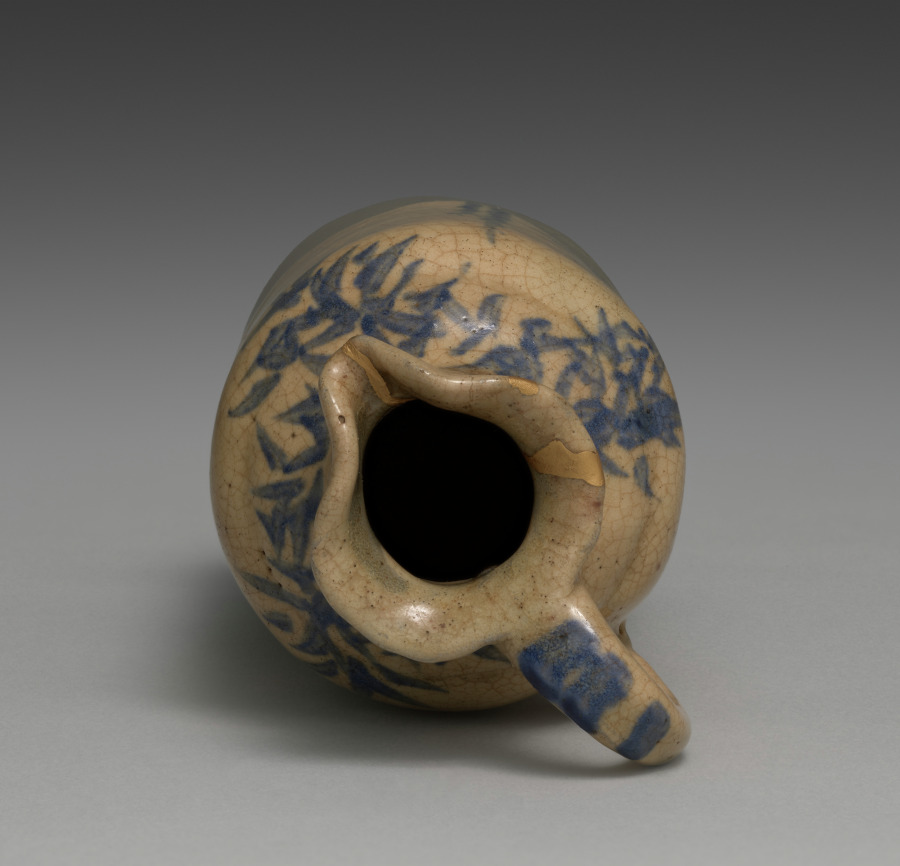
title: Sake Pourer with Bamboo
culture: Japan, Edo period (1615–1868)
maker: attributed to Seifū Yohei I (Japanese, 1801–1861)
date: c. 1844–57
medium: one of a pair of sake flasks; stoneware with white slip, underglaze blue and gold repair (kintsugi) (Kyoto ware)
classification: Ceramic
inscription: The storage box for the pair of vessels is inscribed and impressed with seals.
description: This pair of sake pourers adorned with with bamboo and bellflowers is attributed to the founder of the Seifū Studio, Seifū Yohei I (1801–1861). Yohei I, the lineage founder, was born to the Yasuda family in the city of Kanazawa, which faces the Sea of Japan. His home province of Kaga (in present-day Ishikawa Prefecture) produced its own ceramics, known as Kutani ware, but for his training as a potter, Yohei I chose Kyoto, which produced the more technically advanced porcelainware. He moved to Kyoto around the 1820s and became apprenticed to Nin’ami Dohachi, a leading potter in the city. He later struck out on his own, and it is likely that his teacher gave him the name Seifu Yohei. His works include many exquisitely painted copies of Chinese porcelain, and he also produced stoneware with overglaze color enamels that emulated works in the style of Ogata Kenzan (1663–1743) at which his teacher excelled.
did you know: Sake may be served heated or chilled, and, as with wine, the recommended serving temperature of sake varies greatly by type.